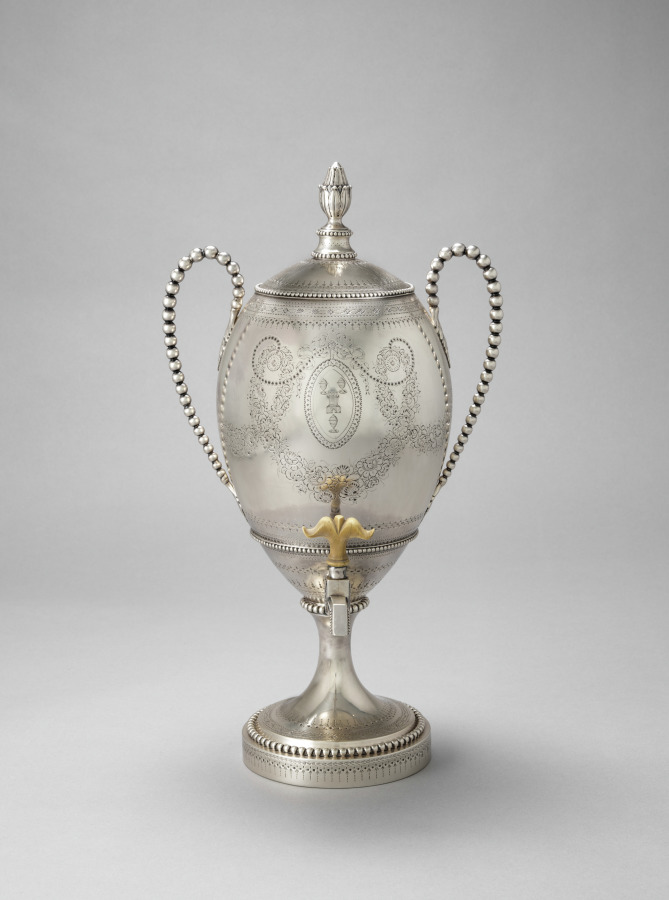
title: Tea Urn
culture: England, London, 18th century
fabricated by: Henry Greenway (British)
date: 1781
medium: silver and ivory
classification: Silver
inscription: engraved on body: coat of arms-- tower surrounded by three covered cups; crest consisting of a squirrel. Engraved on cover: crest consisting of a squirrel (coat of arms of Amcotts family).